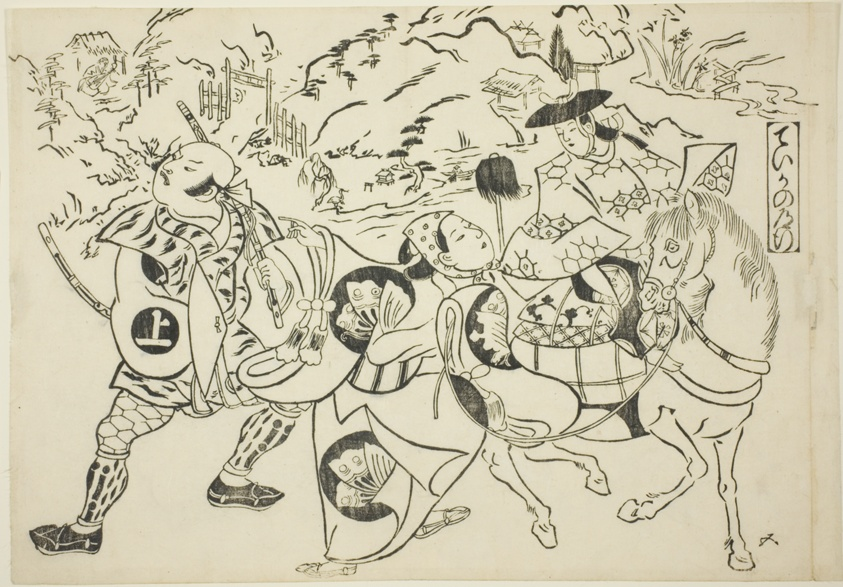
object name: Print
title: Teika's Journey (Taika no michiyuki), from the series "Famous Scenes from Japanese Puppet Plays (Yamato irotake)"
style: Japanese (culture or style)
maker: Okumura Masanobu (Japanese, 1686-1764)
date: c. 1705/06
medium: Woodblock print; oban, sumizuri-e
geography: Japan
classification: woodblock print; print; asian art; woodblock